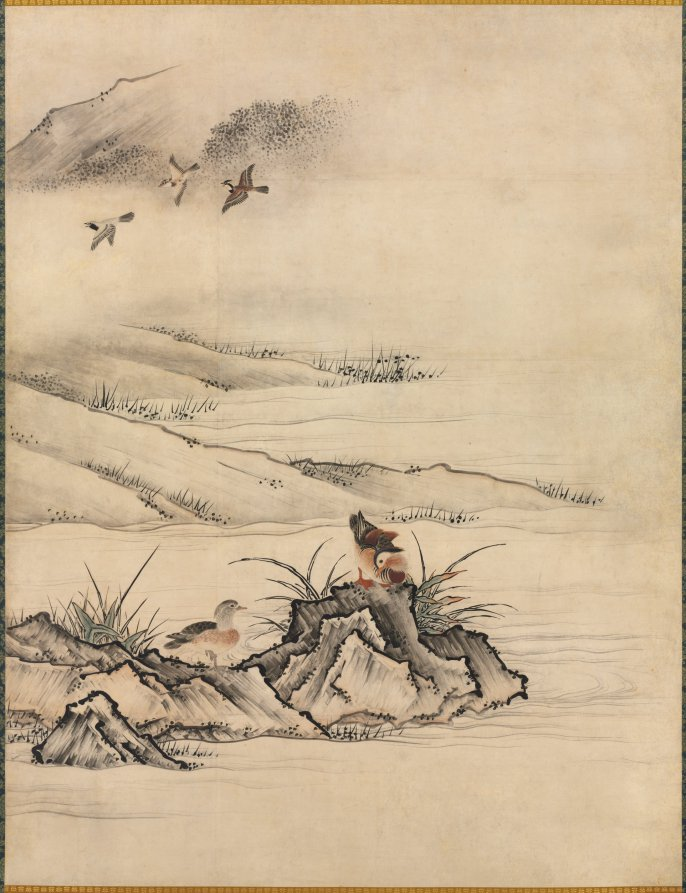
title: Flowers and Birds in a Spring Landscape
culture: Japan, Muromachi period (1392–1573)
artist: attributed to Kano Motonobu (Japanese, c. 1476–1559)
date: 1500s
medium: One of a set of sliding door panels mounted as hanging scrolls; ink and color on paper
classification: Painting